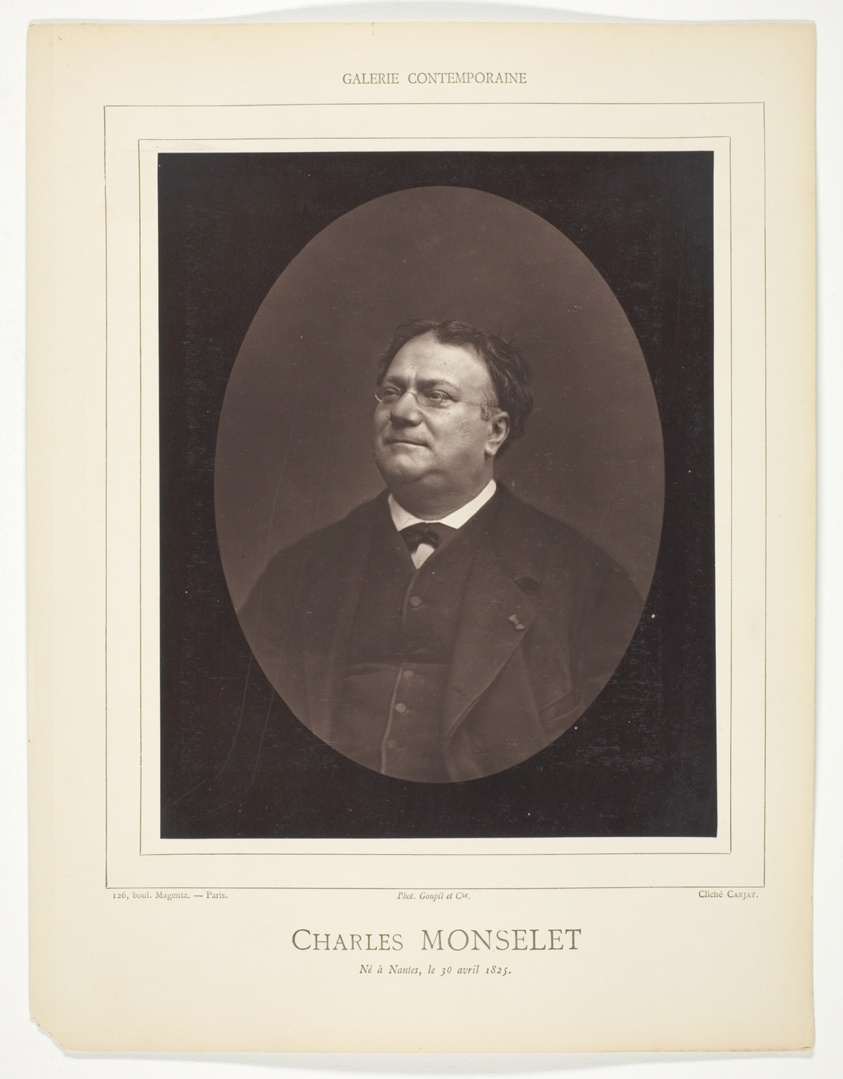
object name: Photograph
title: Charles Monselet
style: 19th century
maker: Etienne Carjat (French, 1828–1906)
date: c. 1876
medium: Woodburytype, from the periodical “Galerie Contemporaine Littéraire, Artistique” (1879), volume 7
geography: France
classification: woodburytype; photomechanical process; photography; photograph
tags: Collected by Hugh Edwards, Contemporaine Littéraire